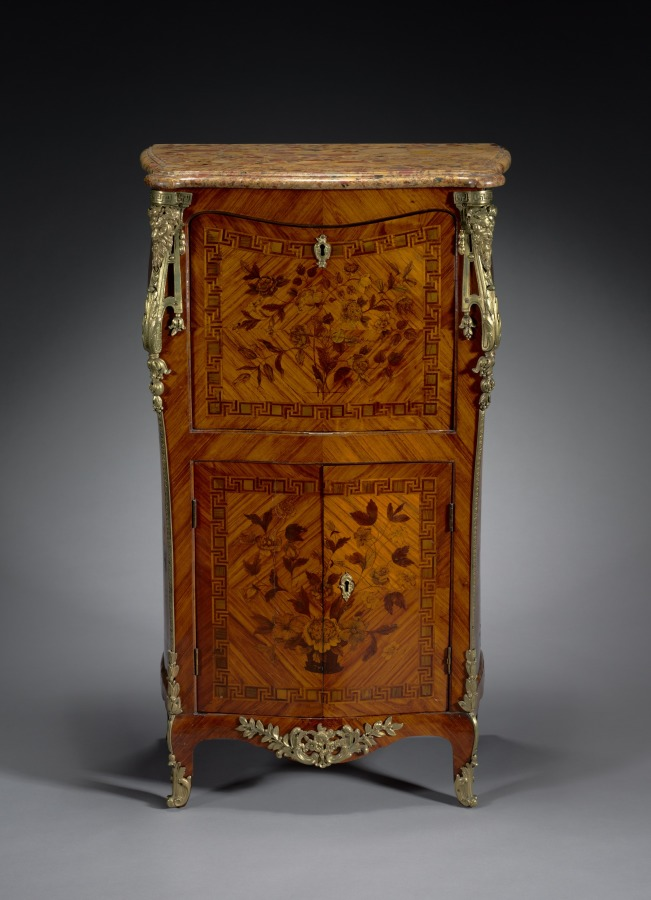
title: Fall-front Secretary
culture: France, 18th century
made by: attributed to Leonard Boudin (French, 1735–1804)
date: c. 1765– 1775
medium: wood marquetry, gilt bronze mounts, marble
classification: Furniture and woodwork